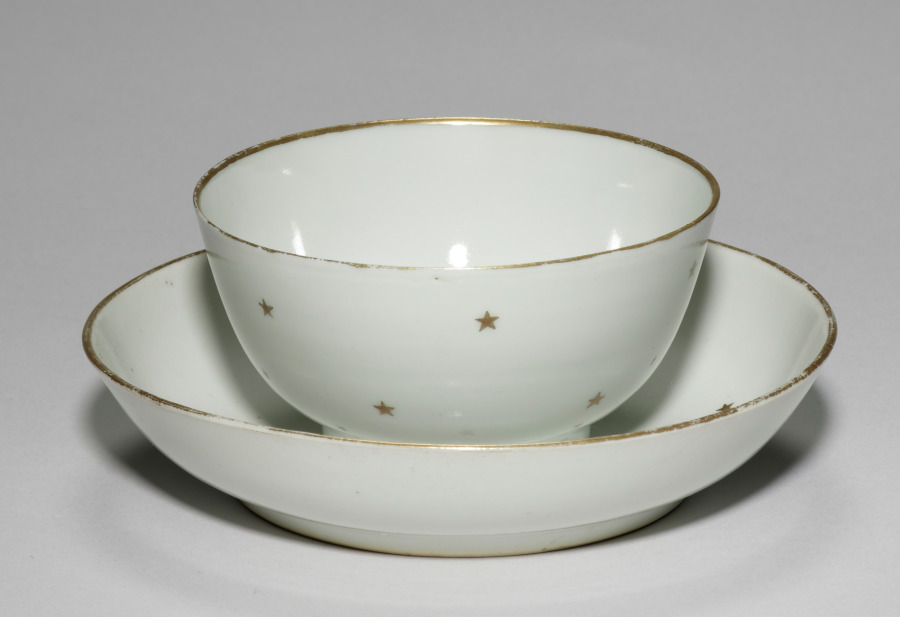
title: Cup and Saucer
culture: China, Chinese Export, 19th century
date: 1800s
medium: porcelain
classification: Ceramic